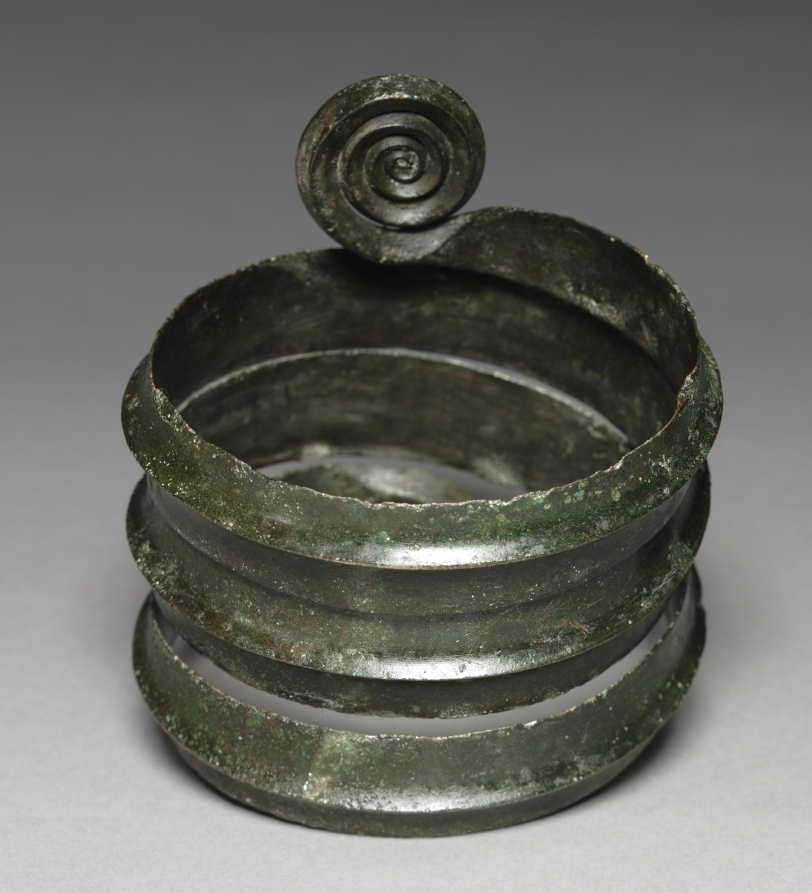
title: Turned Armilla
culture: Hungary, Bronze Age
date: c. 1500 BCE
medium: bronze, wrought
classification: Metalwork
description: Europe. As the spiral mimics forms found in nature - specifically in nautilus shells - it is the basis for logarithmic measures of progression in measurement and growth, which in turn help establish the Fibonacci sequence. Through this sequence we can analyze the phenomenon of spiral designs, specifically in nautilus shells, where the radius of each new chamber grows at a rate determined by a specific proportion to the previous one.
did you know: This armilla or arm ornament has a ridge along the spine, ending in a spiral at both ends.